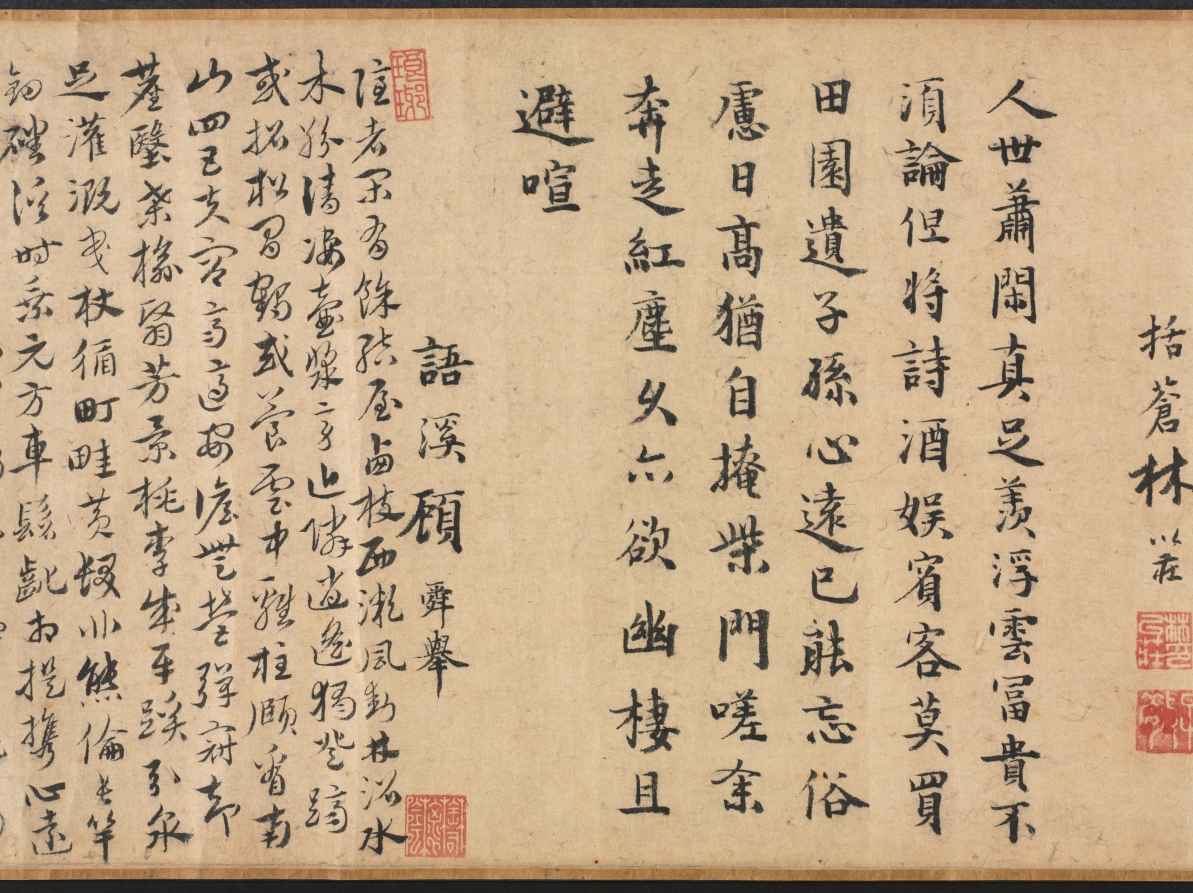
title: Leisure Enough to Spare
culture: China, Yuan dynasty (1271-1368)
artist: Yao Tingmei (Chinese, active mid-1300s)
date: 1360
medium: handscroll, ink on paper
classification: Painting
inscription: 至正廿年春正月_日作此併系鄙語于尾 地偏人遠閉柴關，滿院松陰白晝閒。 眼底風塵渾忘却，坐看流水臥看山。 吳興姚廷美畫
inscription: 23 colophons and 53 seals (dates unavailable for some): 1 colophon, dated 1360, and 2 seals of Yang Weizhen (1296-1370); 1 colophon and 3 seals of Wan Yi; 1 colophon of Zhang Junde; 1 colophon and 3 seals of Angji (act. ca. mid-14th c.); 1 colophon and 1 seal of Xu Shiquan; 1 colophon and 3 seals of Gao Yu; 1 colophon and 2 seals of Li Mingfu; 1 colophon and 2 seals of Lu Lin; 1 colophon and 1 seal of Zhang Qian; 1 colophon of Tao Tangwen; 1 colophon and 1 seal of Wu Yuangui (act. ca. 1300-60); 1 colophon of Bao Jiong; 1 colophon of Wang Zao; 1 colophon and 1 seal of Ma Chuyi; 1 colophon and 1 seal of Lin Yizhuang; 1 colophon and 1 seal of Gu Shunju; 1 colophon and 2 seals of Wang Jing; 1 colophon and 2 seals of Lin Shouchang; 1 colophon and 1 seal of Gao Zhidao; 1 colophon of Lin Xun; 1 colophon, dated 1359, and 2 seals of Meng Weicheng (act. mid-14th c.); 1 colophon and 1 seal of Meng Zhiji (act. mid-l4th c.); 14 seals of Liang Qingbiao 梁清標 (1620-1691); 1 poem dated 1755 and 5 seals of the Qianlong 乾隆 emperor (r. 1736-95); 2 seals of the Jiaqing 嘉慶 emperor (r. 1796-1821); 3 seals of the Xuantong 宣統 emperor (r. 1909-11).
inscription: Title on frontispiece by Zhang Bi 章弼: Signed Gongchen 拱辰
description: Seclusion and leisure—the ideals of the literati, or scholar-gentlemen—are expressed in this mature work by Yao Tingmei. The theme acquired special meaning at a time of the military uprisings near the end of the Yuan dynasty. Dedicated to an ascetic named Du, this work combines painting, calligraphy, and poetry; following the painting are more than 20 poems and essays written by notable scholars, one of whom was the calligrapher Yang Weizhen. It reveals not only the aesthetic taste of the literati but also the practice of contributing artistic and literary works to fulfill social obligations. Yao's painting demonstrates his individual style derived from various ancient masters (Guo Xi, Dong Yuan, and Juran). Yang Weizhen's calligraphy exhibits his bold, vigorous style and his intent to capture the spirit of antiquity in art.